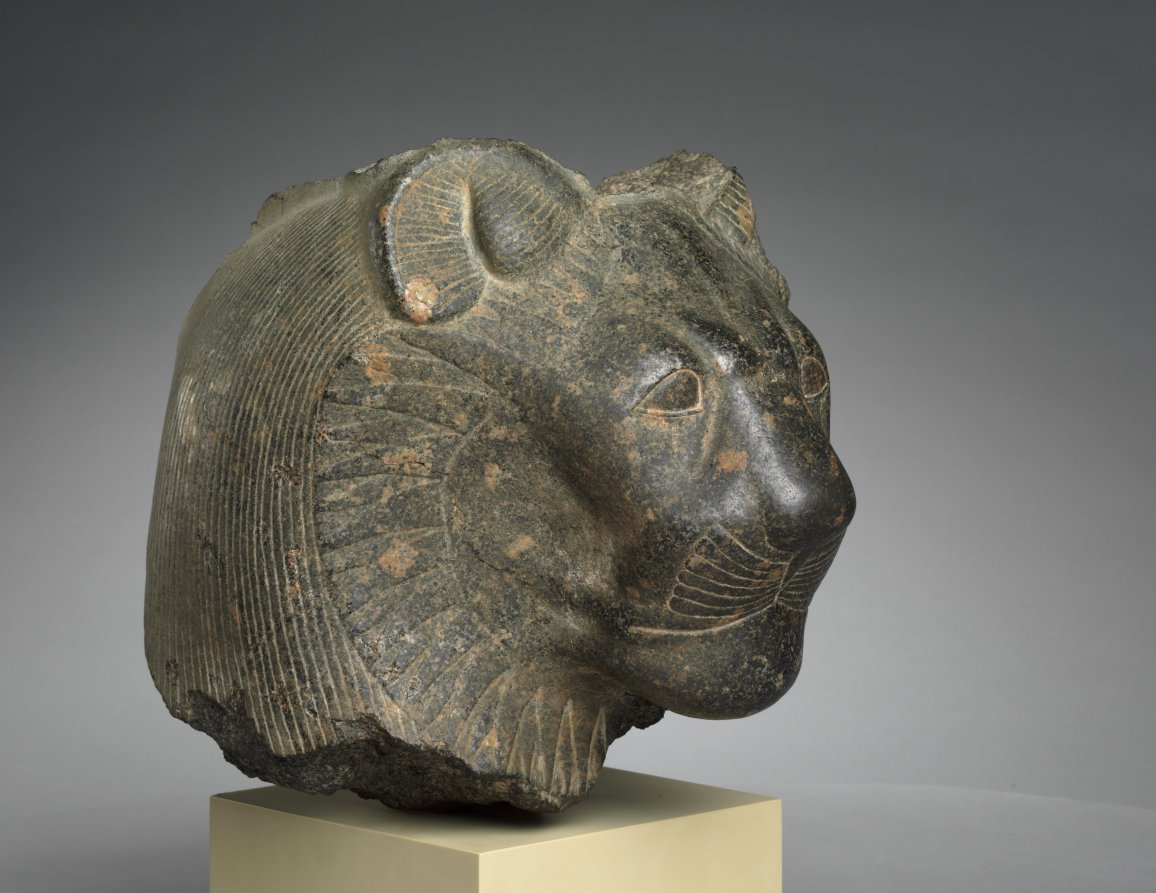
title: Head of Sekhmet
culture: Egypt, Thebes(?), New Kingdom (1540–1069 BCE), Dynasty 18, reign of Amenhotep III (1390–1352 BCE)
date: c. 1391–1353 BCE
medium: granodiorite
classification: Sculpture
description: This lioness head once belonged to a grand statue of the goddess Sekhmet, "the powerful one," probably seated and wearing a tight dress. Possibly appealing to her healing aspect, Pharaoh Amenhotep III, often described as “beloved of Sekhmet,” commissioned and dedicated hundreds of large granodiorite Sekhmet sculptures in his Theban mortuary temple. Thus, this head likely comes from Thebes, perhaps later moved across the Nile—like many such sculptures—to the temple of Mut, a related deity, at Karnak. Behind her stylized ruff, Sekhmet wears a wig, once crowned with a sun disk and uraeus, the stylized cobra symbolizing royal or divine power.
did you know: Amenhotep III may have dedicated 730 statues of Sekhmet, two for each day of the year.